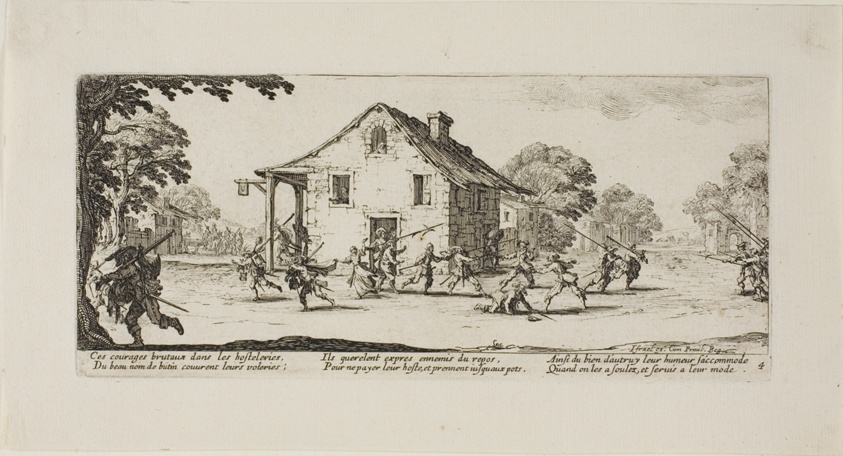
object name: Print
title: Scene of Pillage, plate four from The Miseries of War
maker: Jacques Callot (French, 1592-1635); published by Israël Henriet (French, 1590-1661)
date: 1633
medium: Etching on paper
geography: France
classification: etching; print; prints and drawing